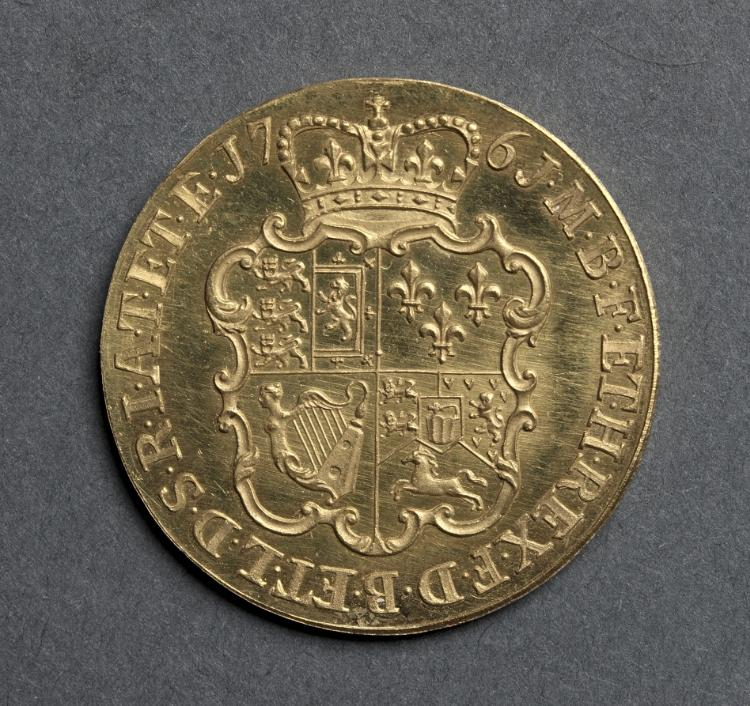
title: Guinea: Ornate Crowned Shield of Arms (reverse)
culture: England, George III, 1760-1820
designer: Richard Yeo (British, 1720–1779)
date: 1761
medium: gold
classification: Coins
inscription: M.B.F.ET.H.REX.F.D.B.ET.L.D.S.R.I.A.T.ET.E.1761.